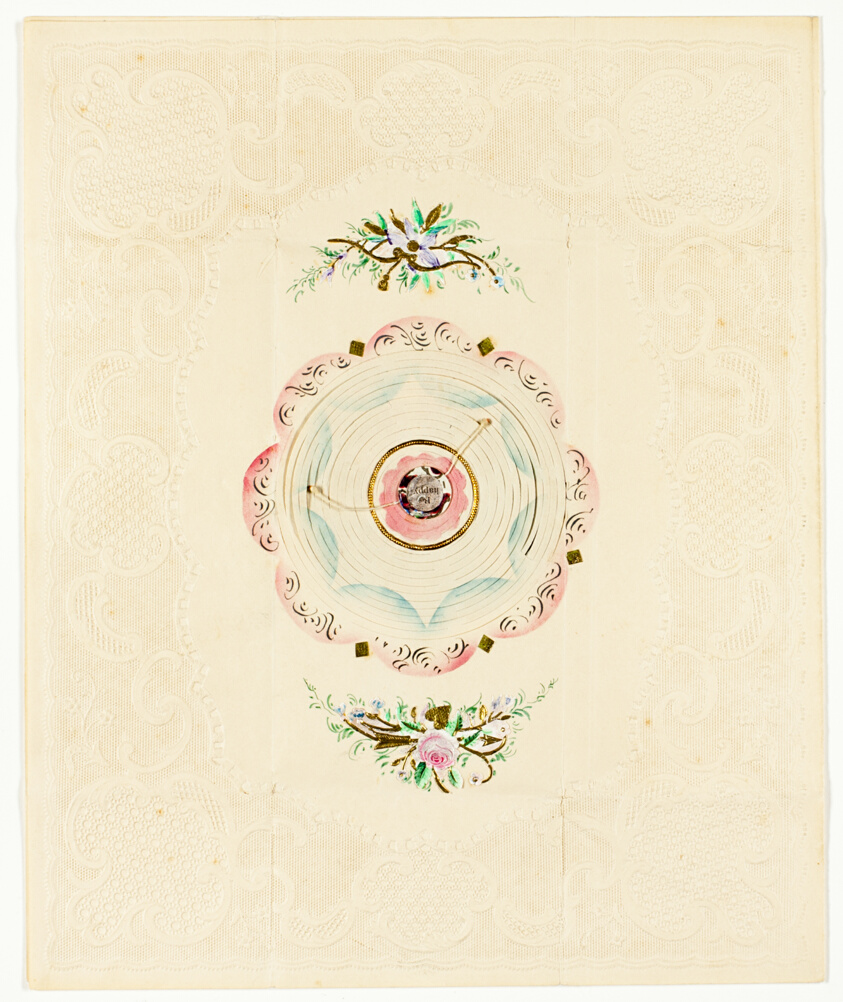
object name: Print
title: Be Thine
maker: Unknown artist; English, 19th century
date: c. 1830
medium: Color print valentine with lace border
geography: England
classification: valentine; prints and drawing; print